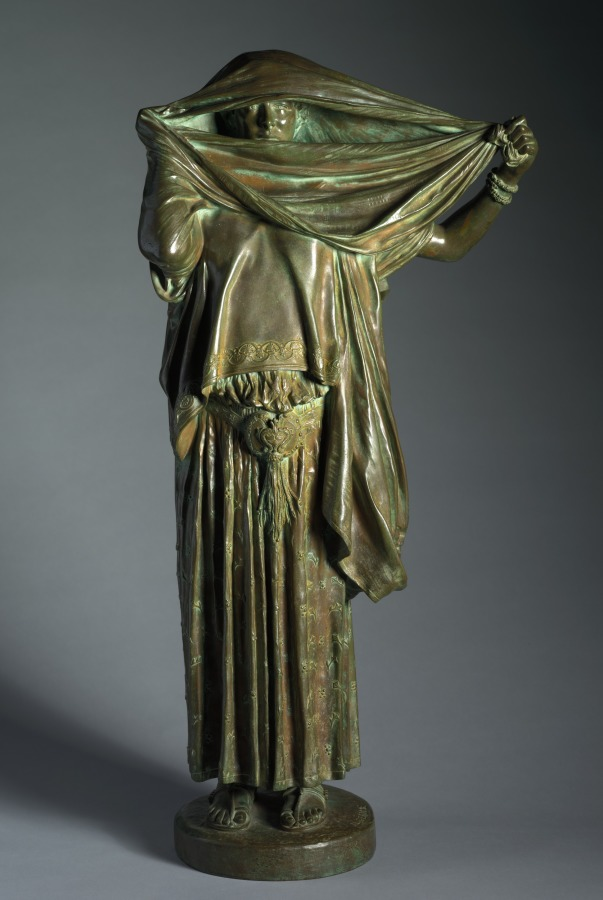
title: Woman with a Veil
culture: France, 19th century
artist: Jean-Léon Gérôme (French, 1824–1904)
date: c. 1891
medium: bronze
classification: Sculpture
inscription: signed upper surface of base: "J L Gerome"; inscribed edge of base at back: "F. Barbedienne, Fondeur, Paris."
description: Many of Gérôme’s best known works reflect the 19th-century European fascination with the Middle East, Asia, and North Africa, which manifested in Orientalist works like this sculpture depicting a woman adjusting her veil. Multiple versions of this sculpture exist, including some with marble and gold additions.